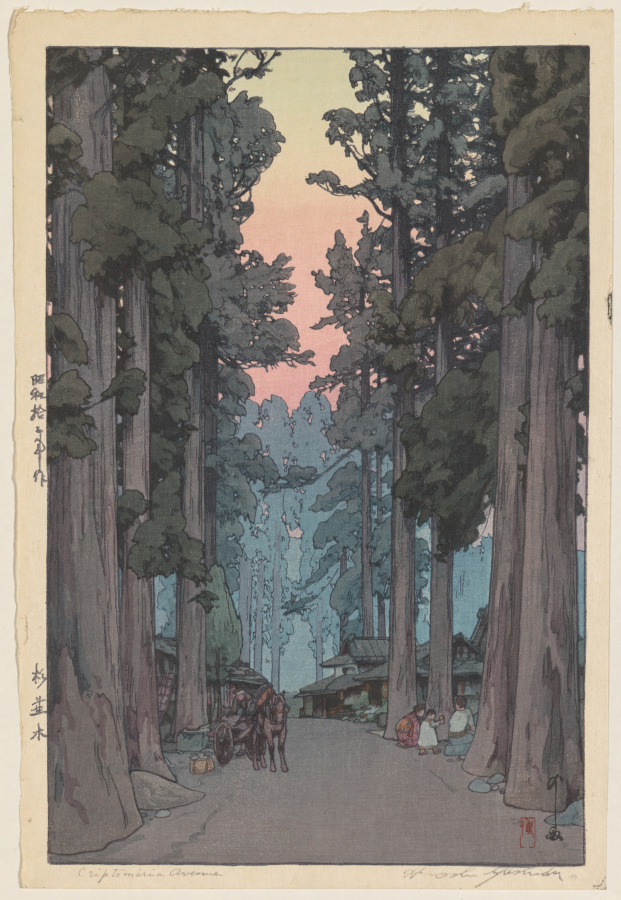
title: Crytomeria Avenue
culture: Japan, Shōwa period (1926–89)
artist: Yoshida Hiroshi (Japanese, 1876–1950)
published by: Yoshida Hiroshi (Japanese, 1876–1950)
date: after 1937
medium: Woodblock print; ink and color on paper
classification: Print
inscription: lower margin, in graphite: Crytomeria Avenue Hiroshi Yoshida